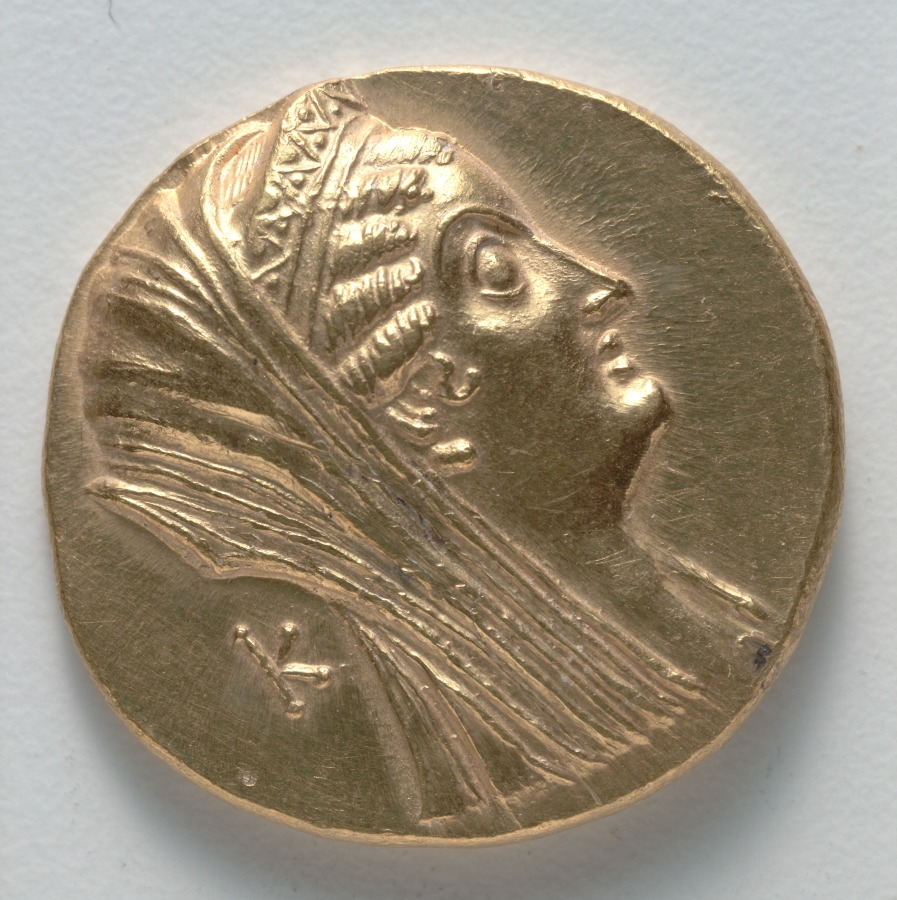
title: Octodrachm: Head of Arsinoe II (obverse); Double Cornucopia (reverse)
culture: Greek, Ptolemaic, minted at Alexandreia (Egypt), reign of Ptolemy V Epiphanes or Ptolemy VI Philometor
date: 205–145 BCE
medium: gold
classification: Coins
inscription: ΑΡΣΙΝΟΗΣ | ΦΙΛΑΔΕΛΦΟΥ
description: On this long-lived series of coinage, Arsinoe II, a divinized Hellenistic queen, wears the crown and veil associated with Hera; a scepter may be just visible beside her neck. The daughter of Ptolemy I, founder of the Hellenistic Greek dynasty that ruled Egypt for nearly three centuries, Arsinoe married Lysimachos, king of Thrace, at the age of fifteen. After his death, she married first her half-brother and then her full brother, Ptolemy II, beginning a long-lasting Ptolemaic dynastic tradition of sibling marriage. Twin cornucopias on the reverse of this coin likely refer to the divine ruling couple, presaged in Egypt by Isis and Osiris, and in Greece by Zeus and Hera.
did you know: The small horn around Arsinoe’s ear, referencing the Egyptian god Amon-Re, marks her divine status.